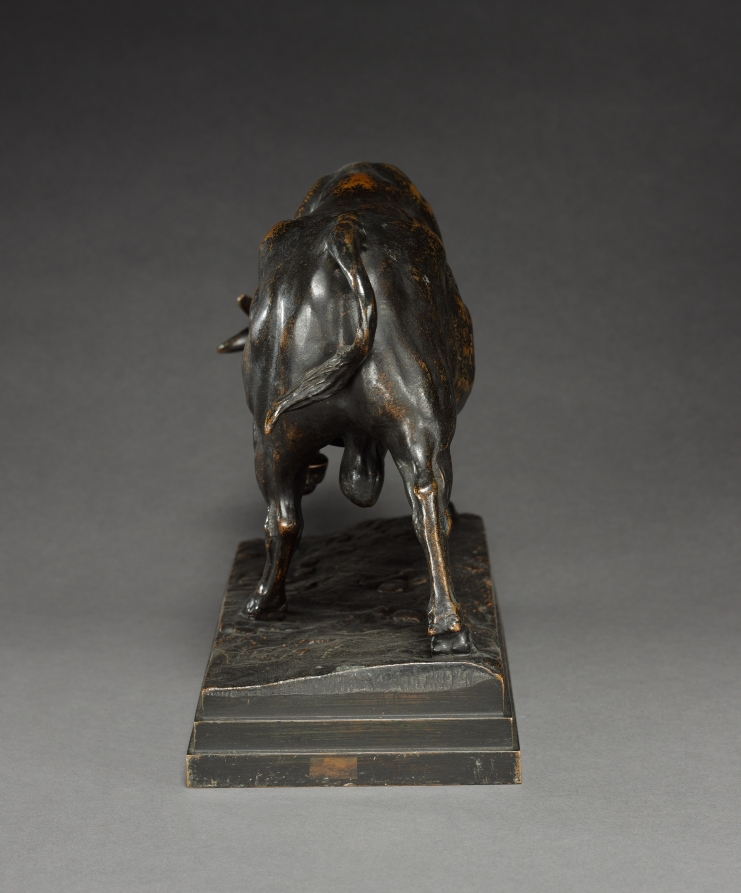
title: Bull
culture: France, 19th century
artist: Antoine-Louis Barye (French, 1796–1875)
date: c. 1841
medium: bronze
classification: Sculpture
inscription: Signed: "Barye"